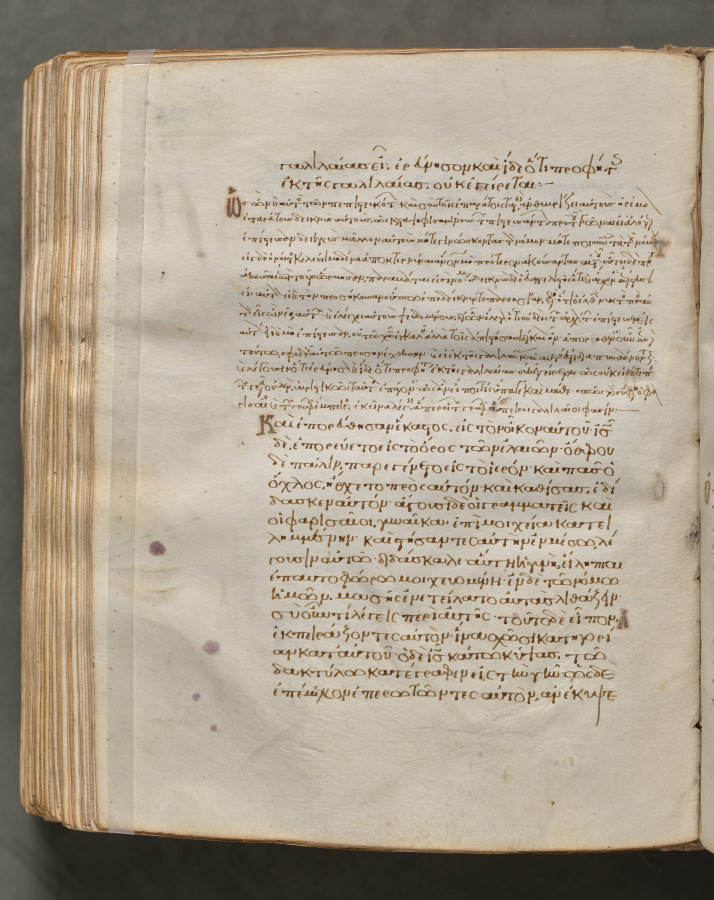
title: Text, folio 361 (verso), from a Gospel Book with Commentaries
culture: Byzantium, Constantinople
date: c. 1000–1100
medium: ink, tempera, and gold on vellum; leather binding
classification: Bound Volume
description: Each of the four gospels in this book opens on a page with brilliantly illuminated borders depicting the author of the text as well as birds—principally peacocks, symbols of the immortality of the soul—and fountains, representing the fountain of life and the salvation of the soul. This volume consists of 428 leaves with texts in Greek. Its level of sophistication suggests that it was probably written and decorated in a monastery in Constantinople.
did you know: Gospel books were carried in procession through Byzantine churches.